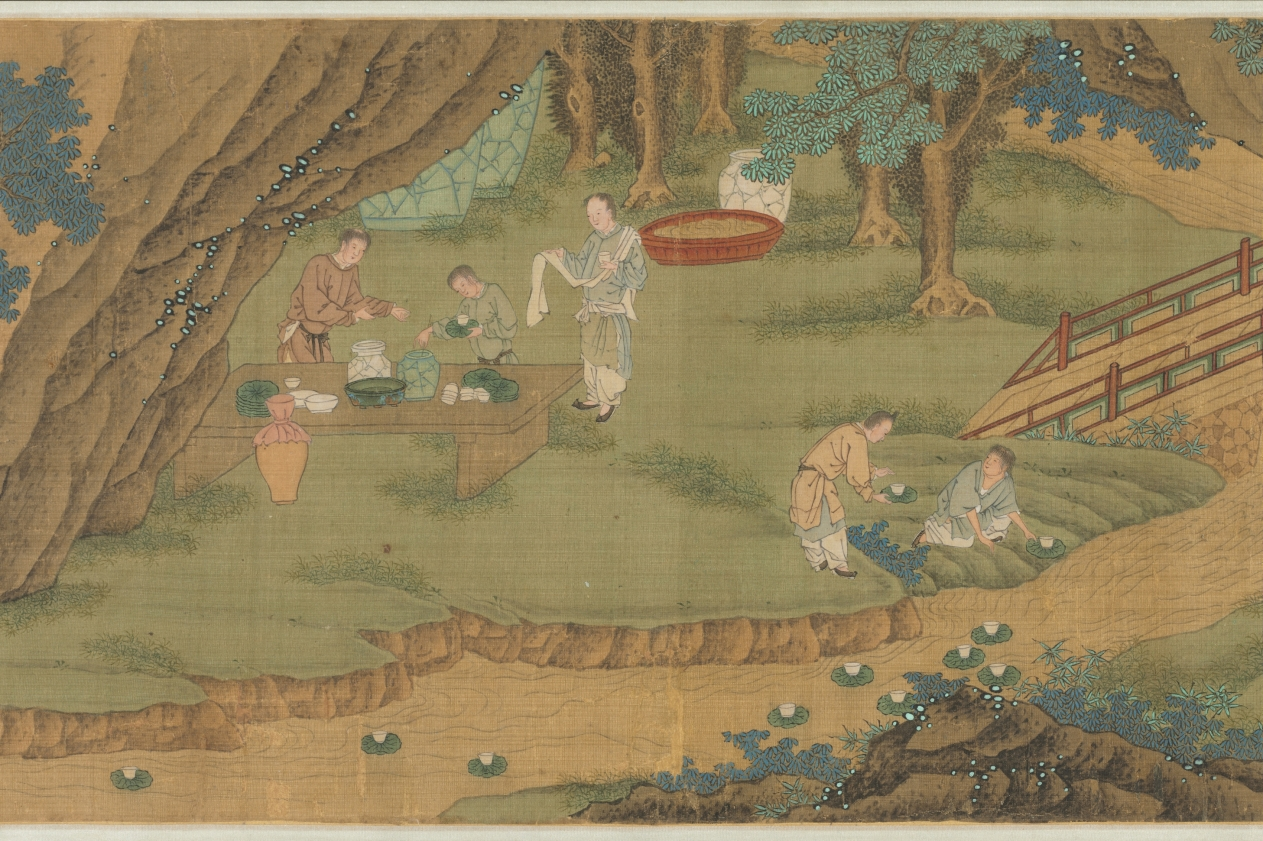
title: Purification at the Orchid Pavilion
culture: China, Qing dynasty (1644-1911)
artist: Fan Yi (Chinese, c. 1615–before 1688)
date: 1671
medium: Handscroll; ink and color on silk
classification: Painting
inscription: Artist's inscription, signature, and 2 seals: Painted by Fan Yi of Zhongfu during the second month of winter of the xinhai year [1671]. [2 seals] Fan Yi zhi yin, Zi yu yi.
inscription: Title on the frontispiece by Monk Yueshan (1629-1709).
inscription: 3 colophons and 13 additional seals: 1 colophon, dated 1707, and 6 seals of Yueshan; 2 colophons and 3 seals of Wong Kwan-Shut (Huang Junshi) 黃君實 (b. 1934); 2 seals of Fu Shen 傅 申 (b. 1937); 2 seals of Tessai Tomioka 富岡鐵齋 (1836-1924).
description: By the 1600s, the historic gathering at Lanting, Zhejiang province, in 353 CE was a common theme in Chinese painting. Originally based on a composition attributed to Li Gonglin (1049– 1106), now lost, Wu school artists revived the theme. Fan Yi, the brother of the artist Fan Qi from Nanjing, used delicate brushwork and luminous colors to depict the spring gathering.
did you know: The gathering’s host is in the Orchid Pavilion at the end of the scroll, representing an episode known as “Wang Xizhi Watching the Geese 王羲之觀鵝圖.”